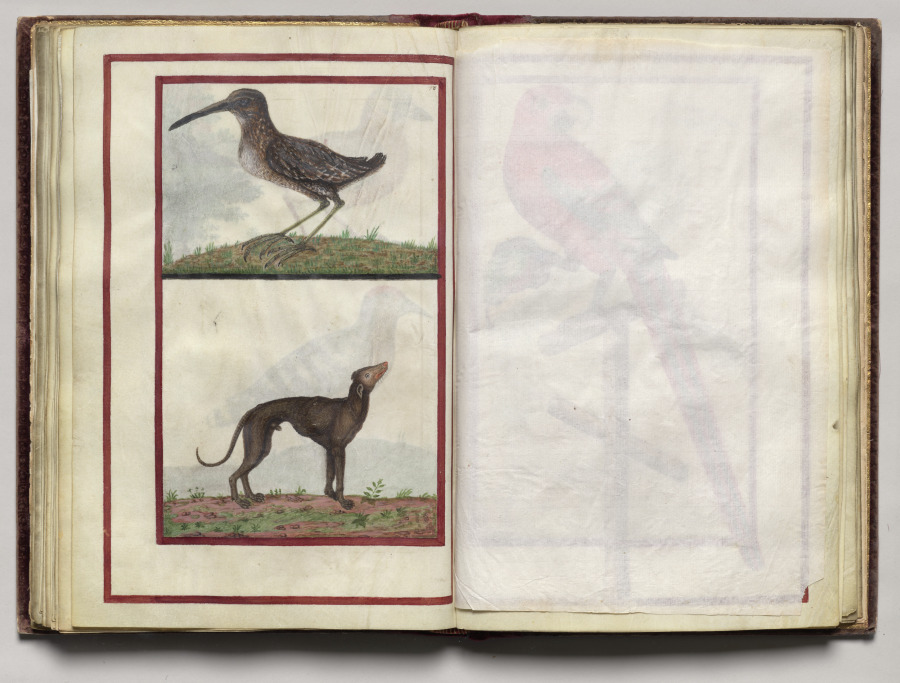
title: Bird and Dog, folio 37 (verso), from Florilegium (A Book of Flower Studies)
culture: France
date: 1608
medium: watercolor, ink, silver and gold over occasional traces of pencil, on vellum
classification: Bound Volume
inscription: Dated: Poitiers 1608 (on frontispiece) Signed: On frontispiece in black ink, lower right: Van Kuyk Notation on drawing: Frontispiece: in pencil, lower margin: * élève de Van Kessel, peintre flammand (* in pencil also appears in front of Van Kuyk's name).